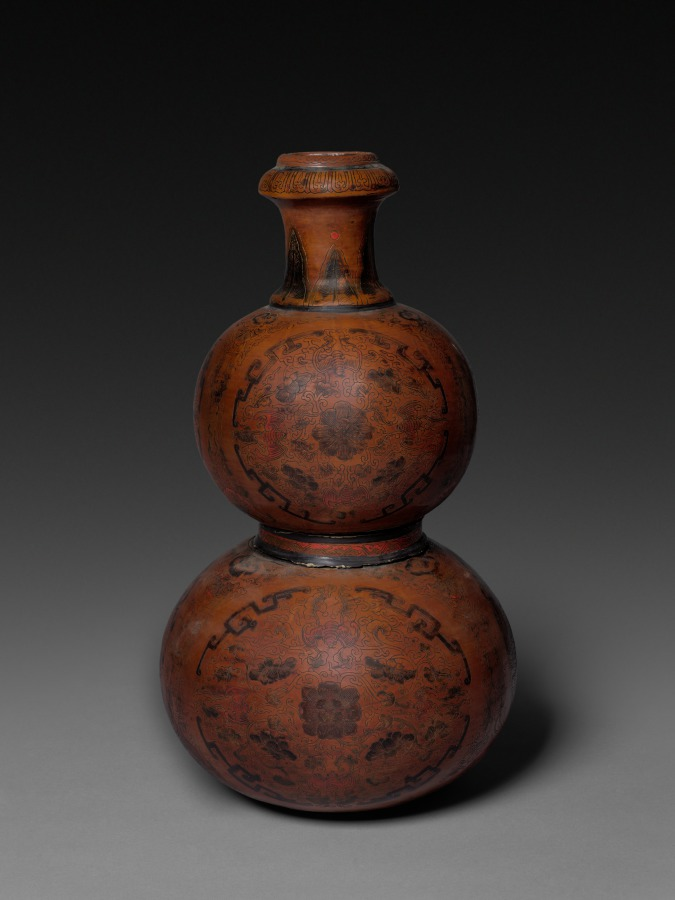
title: Vase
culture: China, Qing dynasty (1644-1911)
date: 1644–1911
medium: lacquered wood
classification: Lacquer